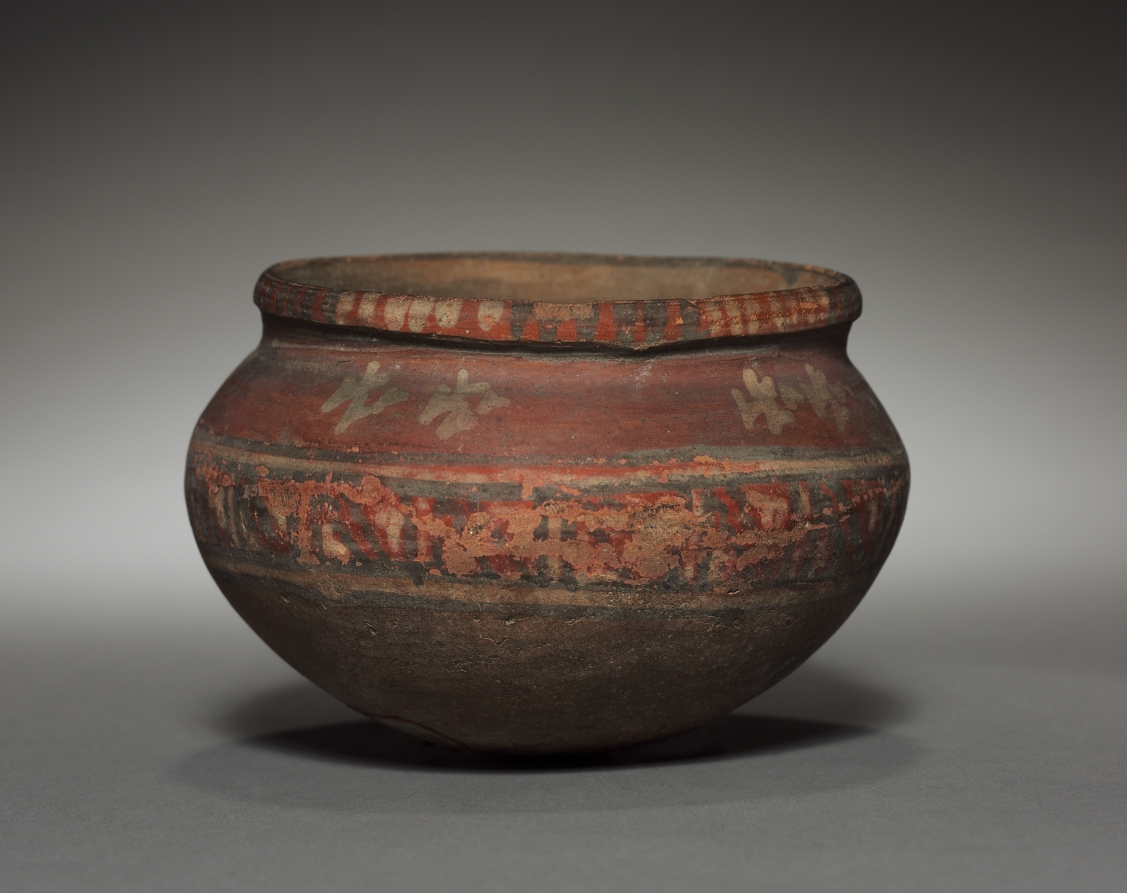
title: Bowl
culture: Peru, South Coast, 10th-11th century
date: 900–1100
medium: pottery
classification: Ceramic